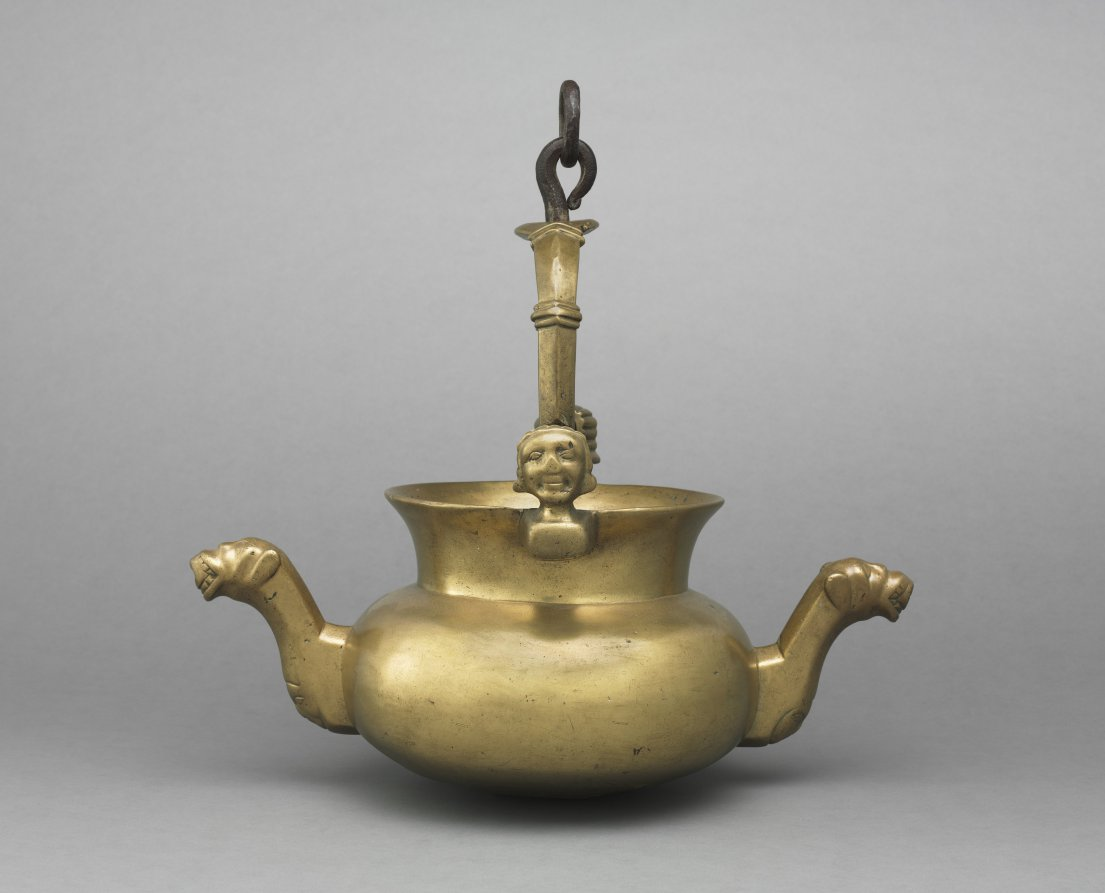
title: Lavabo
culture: South Netherlands, Valley of the Meuse, 15th century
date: 1400s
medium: brass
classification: Metalwork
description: In the Middle Ages a variety of vessels were used for hand washing. This brass container, called a lavabo, was designed to hold a large quantity of water and may have functioned in either a domestic or a liturgical setting. Its large capacity and relatively simple decoration suggests it served a communal function, either in a private home or perhaps in a monastery where it would have served as a hand-washing station near the refectory. In private homes, lavabos of similar design were usually hung from a chain or a trammel hook over or near the fire in the kitchen. The ring inserted at the top of the handle would have allowed for the rotation of the vessel while it was suspended, facilitating access to the spouts for water. Seen in conjunction with other vessels displayed nearby, this object illustrates the variety of hand-washing vessels used by medieval men and women.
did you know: On either side of the handle appear two human faces while the spouts themselves are animals, perhaps lions or dogs.